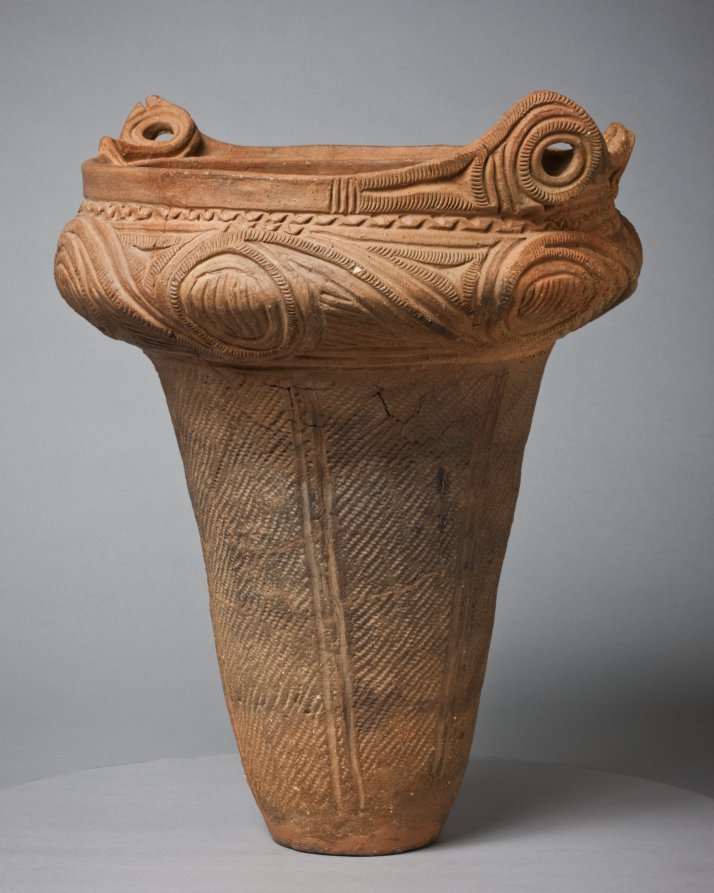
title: Urn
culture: Japan, Jōmon period (c. 10,500–300 BCE)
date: c. 2000 BCE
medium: earthenware, terracotta, impressed and incised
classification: Ceramic